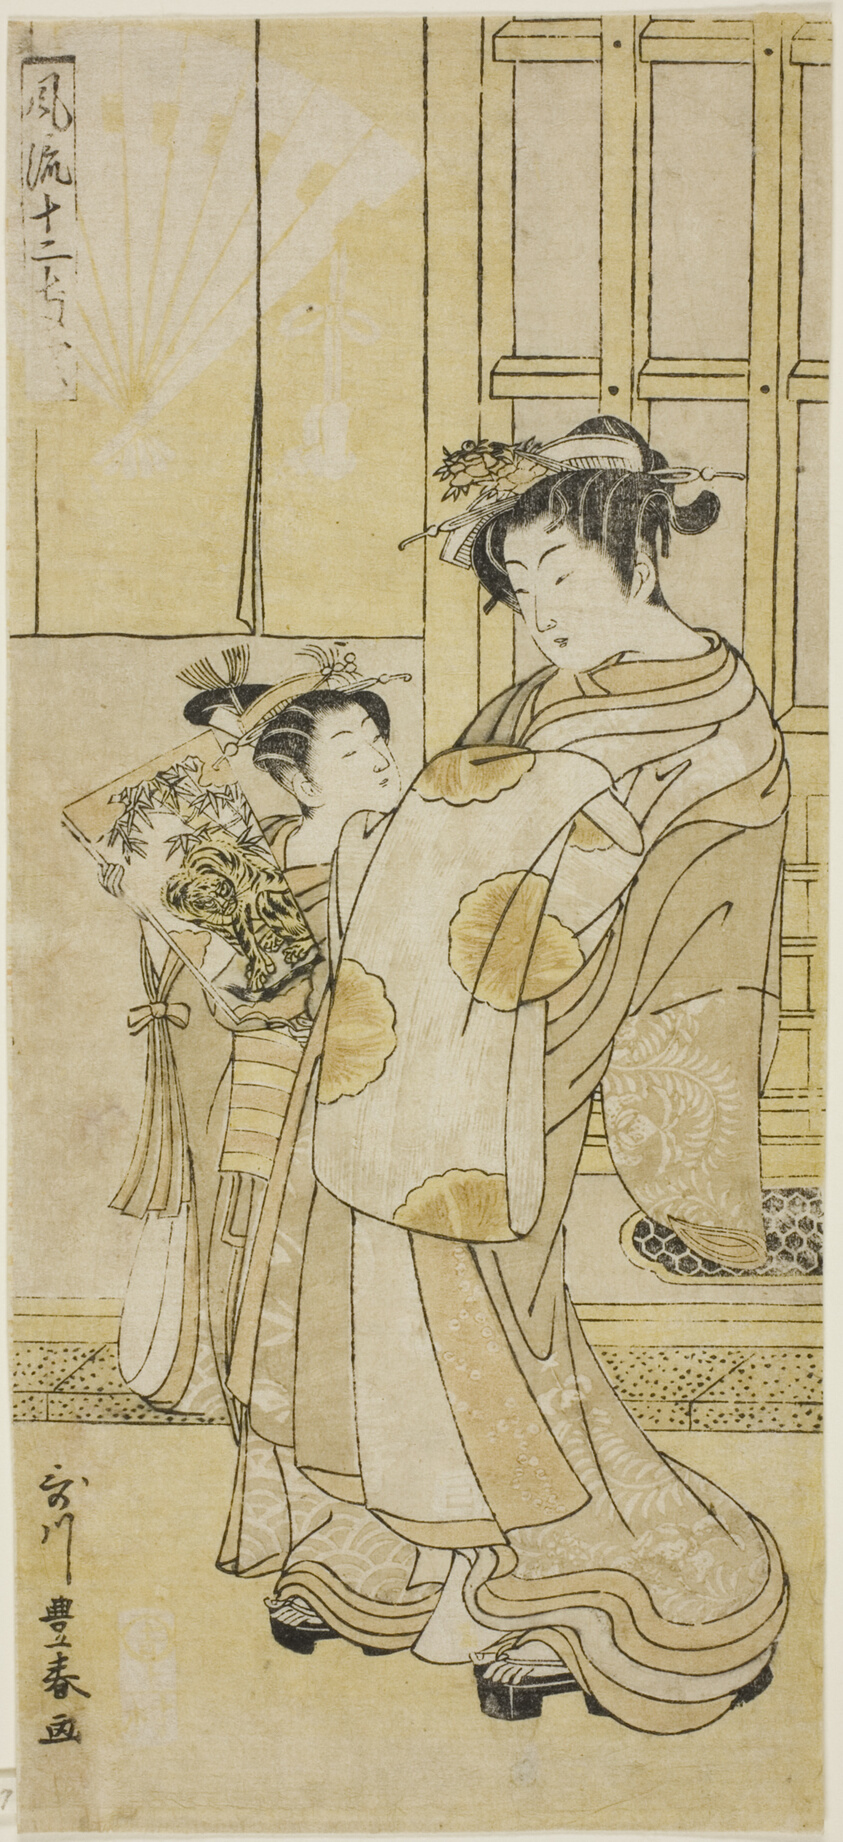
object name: Print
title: Courtesan and attendant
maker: Utagawa Toyoharu (Japanese, 1735-1814)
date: 1770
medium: Color woodblock print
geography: Japan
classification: print; asian art